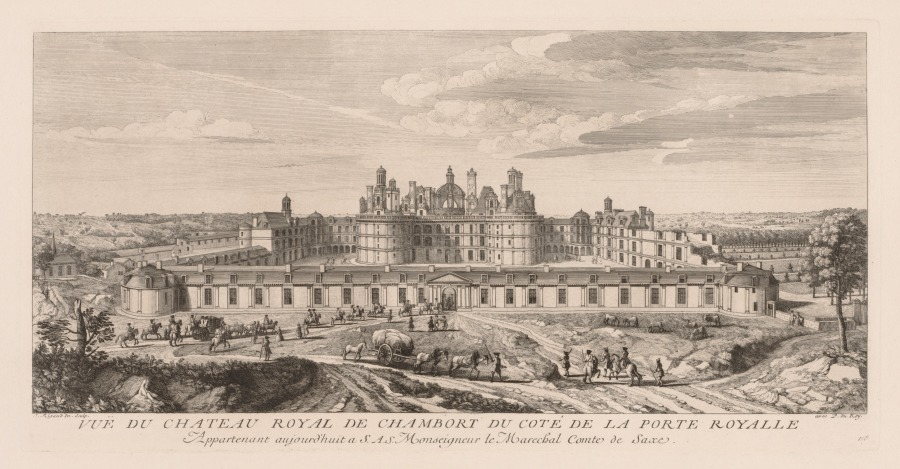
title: Vue du Château royal de Chambord, du côte de la Porte royale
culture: France, 18th century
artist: Jacques Rigaud (French, 1681–1754)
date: c. 1720–50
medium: engraving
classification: Print